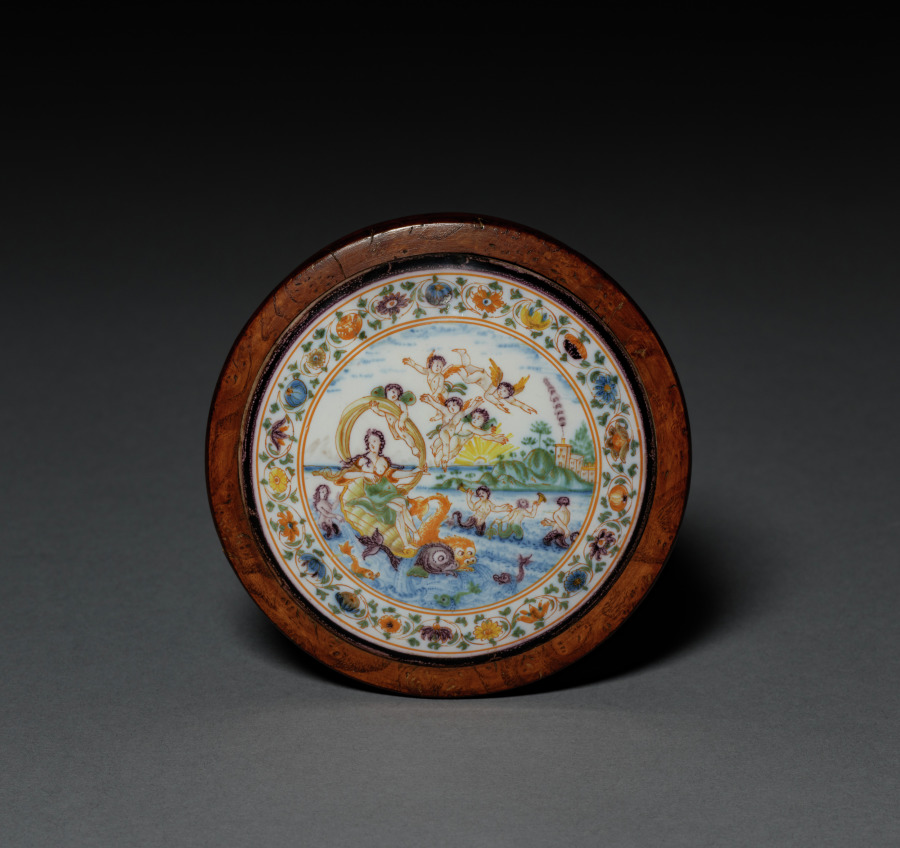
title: Cover for a Box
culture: France, Moustiers, 18th century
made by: Olerys Factory (French)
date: c. 1750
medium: faience encased with burled wood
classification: Ceramic